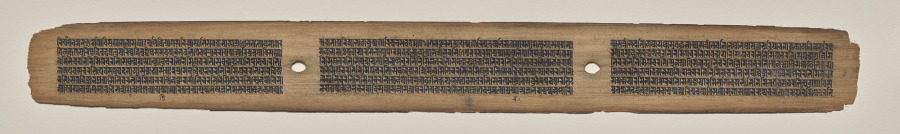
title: Text, Folio 5 (recto), from a Manuscript of the Perfection of Wisdom in Eight Thousand Lines (Ashtasahasrika Prajnaparamita-sutra)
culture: Eastern India, Bihar, Vikramashila Monastery. Painting: Nepal, Kathmandu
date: Sunday, September 14, 1119 (year 239 of the Newar Samvat in the month of Ashvina)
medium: Gum tempera and ink on palm leaf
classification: Painting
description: This manuscript, consisting of 188 double-sided folios, was calligraphed by a scribe at a monastery in northeastern India, commissioned by a monk from Nepal.